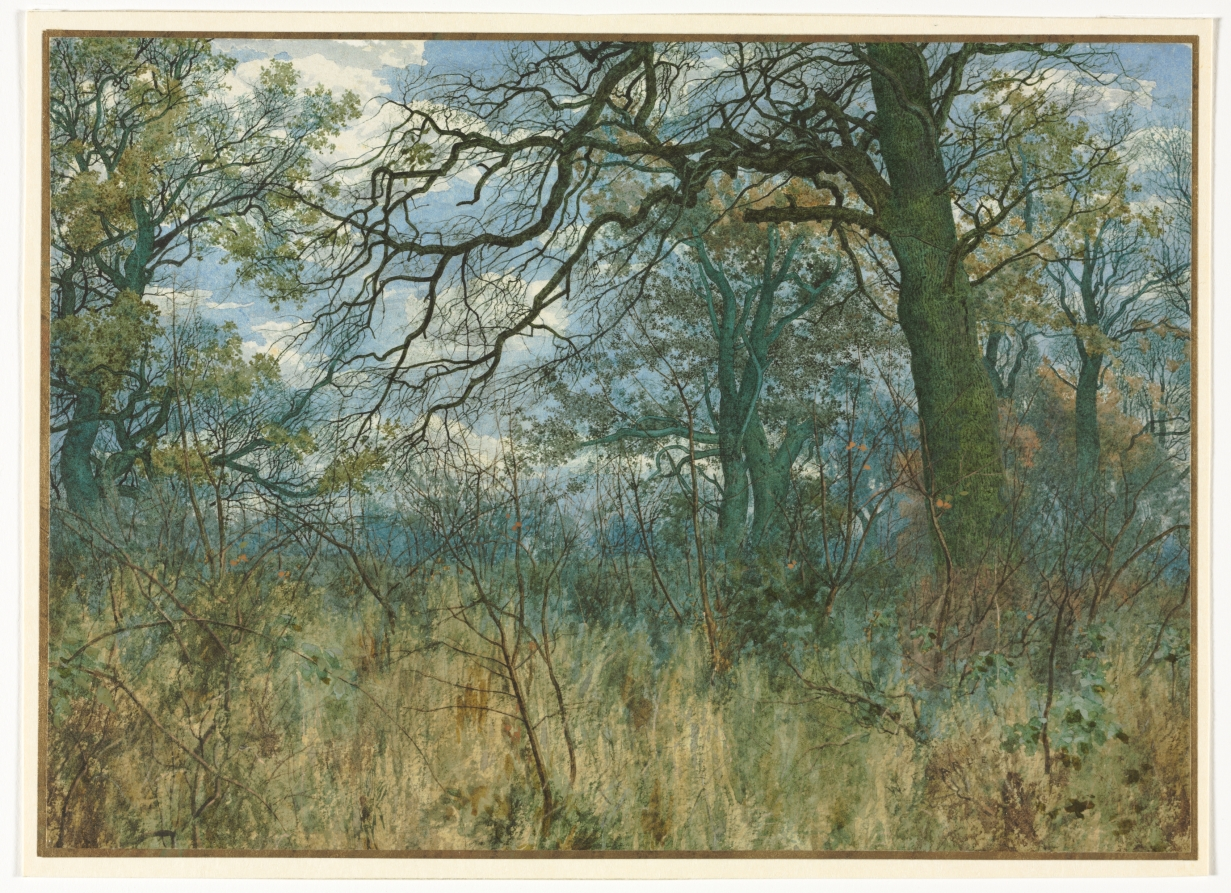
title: Trees and Undergrowth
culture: England, 19th century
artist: Garden William Fraser (British, 1856–1921)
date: 1885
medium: watercolor with gouache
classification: Drawing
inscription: signed and dated, in brown watercolor, at lower right: 1885 / W.F. Garden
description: William Fraser Garden’s work was based on the rendering of minute detail with painstaking brushwork and handling of color. Here, he describes an insignificant corner of the Bedford landscape: a tangled thicket in which dry grasses and saplings commingle. Bare branches stretch across a bright blue sky, creating a pattern as intricate as a spider’s web. This may have been the drawing that Garden exhibited at the Royal Academy in 1885 with the title Early Spring in the Woods. A pale green haze in the grass, the azure sky, and scattered wildflowers suggest the promise of spring.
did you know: Although William Fraser Garden received critical recognition for his watercolors early in his career, he lived and worked in relative obscurity and was plagued by financial troubles for most of his life.